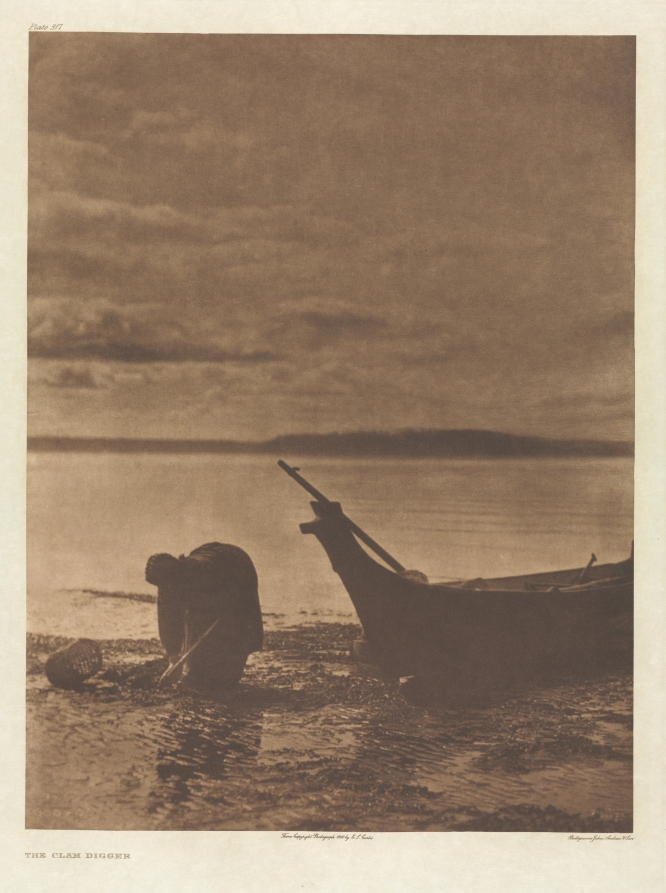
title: Portfolio IX, Plate 317: The Clam Digger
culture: America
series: The North American Indian: being a series of Portfolios picturing and describing the Indians of the United States, the Dominion of Canada, and Alaska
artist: Edward S. Curtis (American, 1868–1952)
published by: The University Press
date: 1900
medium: photogravure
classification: Portfolio